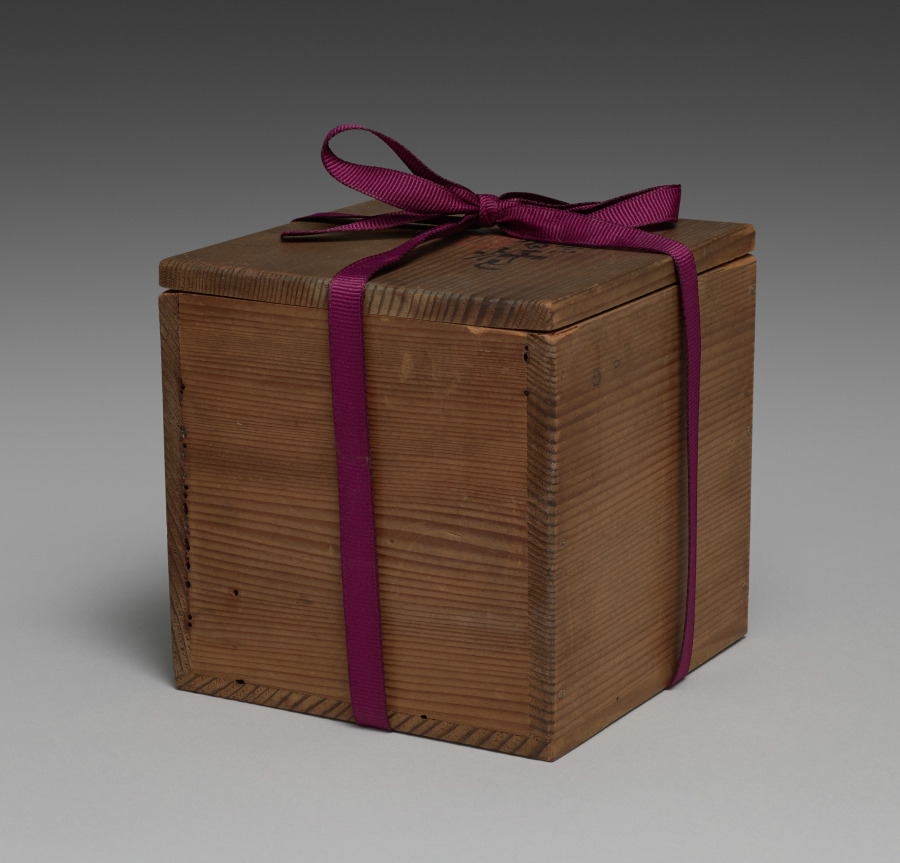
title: Incense Burner with Flowers and Dots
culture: Japan, Meiji period (1868–1912)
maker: Seifū Yohei III (Japanese, 1851–1914)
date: 1893–1914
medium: Porcelain with creamy white translucent glaze and molded and incised design with openwork silver lid in shape of flower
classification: Ceramic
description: Yohei III made incense burners in a wide variety of designs and styles. The body and glaze of this one are taihakuji, or “great white porcelain,” an important early invention Yohei III devised in 1872 that involved the combination of a distinctive translucent, creamy glaze over an ivory-colored clay body. The silver lid is meant to look like a single flower. The vessel has tapering legs with a combined curvilinear and geometric design; the bands encircling the middle have simple, incised flower motifs alternating with single dots.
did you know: This incense burner has floral motifs on both the lid and the burner.